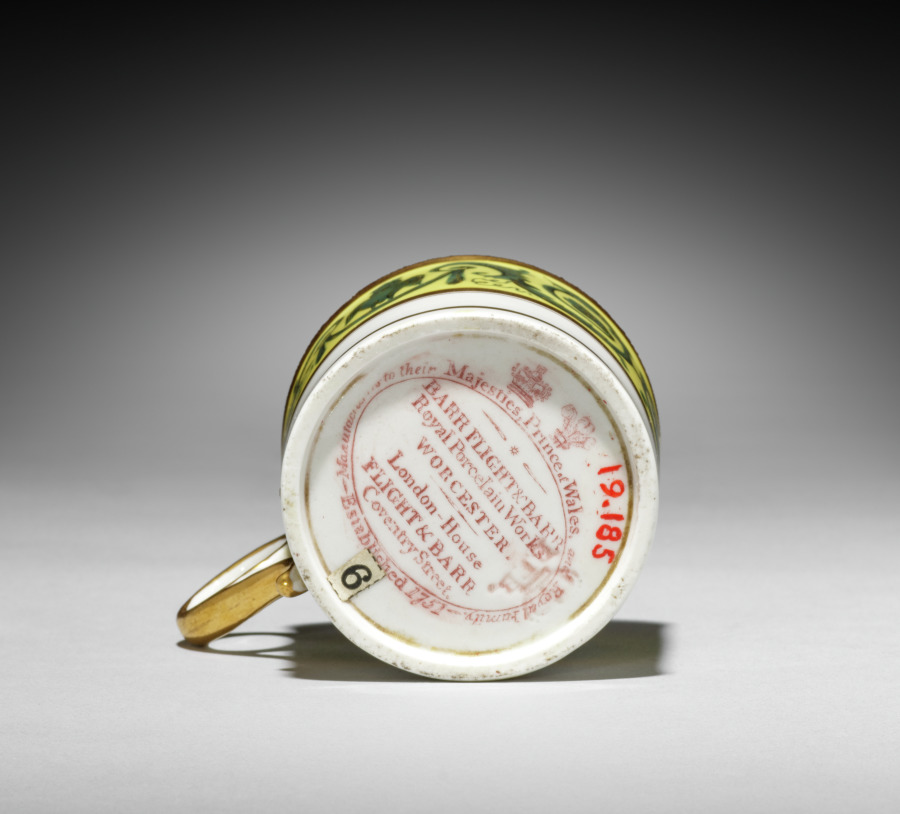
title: Cup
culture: England, 19th century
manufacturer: Worcester Porcelain Factory (British, established 1751)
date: 1807–1813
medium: porcelain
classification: Ceramic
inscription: in overglaze red: "Barr, Flight and Barr/ Royal Porcelain Works/ Worcester/ London -- House/ Flight & Barr/ Coventry Street," surrounded by: "Manufacturers to their Majesties Prince of Wales and Royal Family. Established 1751."